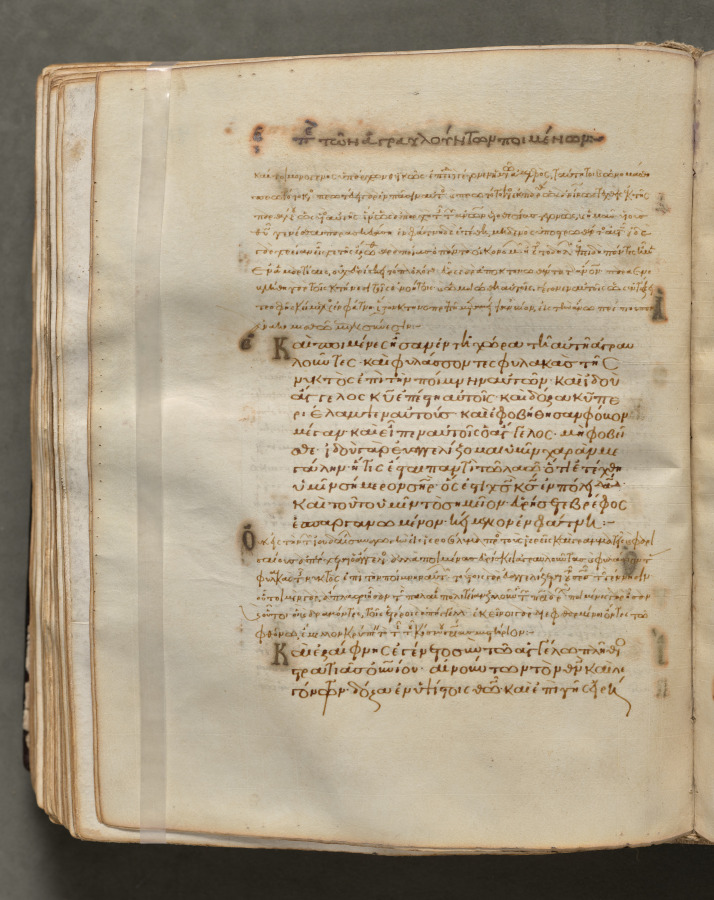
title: Text, folio 208 (verso), from a Gospel Book with Commentaries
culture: Byzantium, Constantinople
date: c. 1000–1100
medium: ink, tempera, and gold on vellum; leather binding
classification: Bound Volume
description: Each of the four gospels in this book opens on a page with brilliantly illuminated borders depicting the author of the text as well as birds-principally peacocks, symbols of the immortality of the soul-and fountains, representing the fountain of life and the salvation of the soul. This volume consists of 428 leaves with texts in Greek. Its level of sophistication suggests that it was probably written and decorated in a monastery in Constantinople.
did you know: Gospel Books were carried in procession through Byzantine churches.